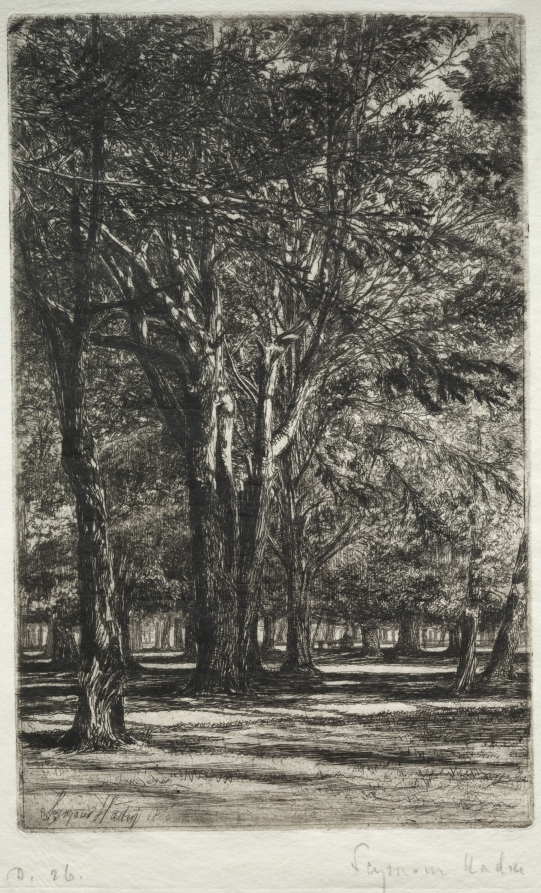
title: Kensington Gardens (The Larger Plate)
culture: England, 19th century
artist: Francis Seymour Haden (British, 1818–1910)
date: 1860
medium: etching and drypoint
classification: Print